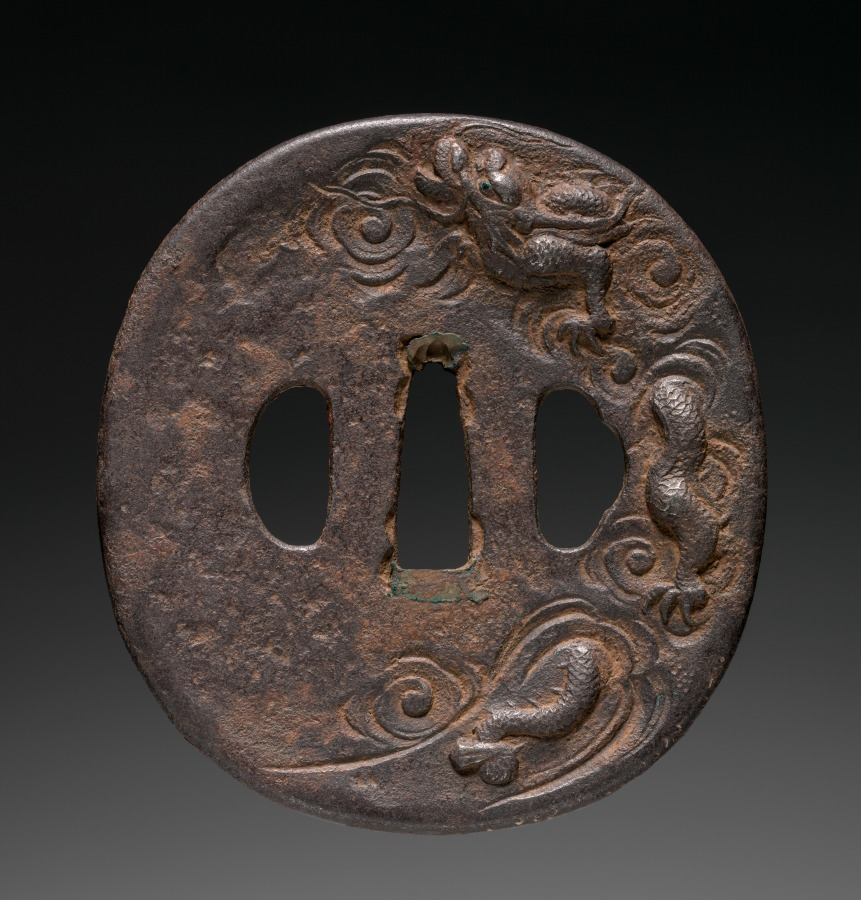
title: Sword Guard (Tsuba) with Dragon in Cloud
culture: Japan, possibly Edo period (1615-1868)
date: c. 1615–1868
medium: iron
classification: Arms and Armor